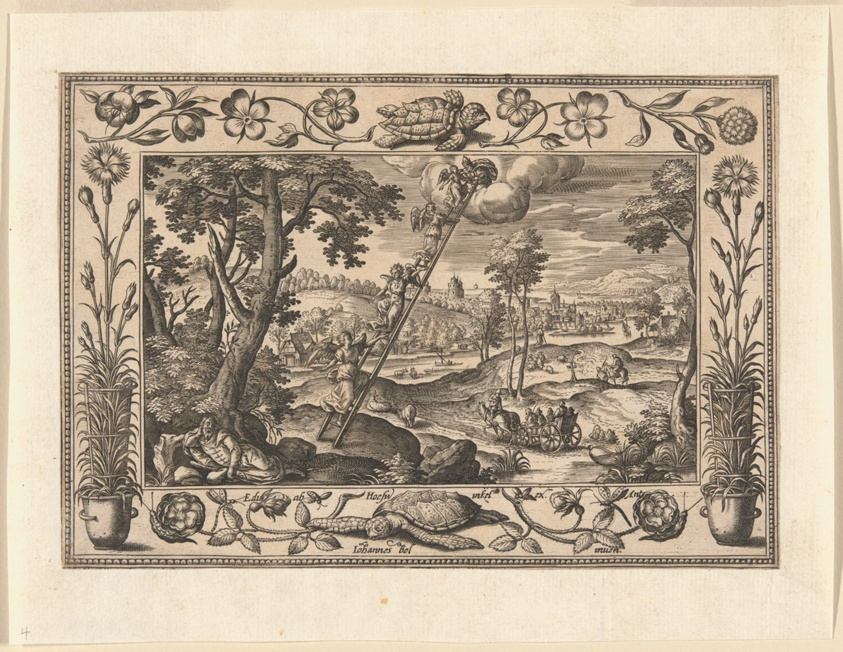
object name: Print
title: Jacob's Dream, from Landscapes with Old and New Testament Scenes and Hunting Scenes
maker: Adriaen Collaert (Flemish, c. 1560–1618); after Hans Bol (Flemish, 1535–1593); published by Anna van Hoeswinckel (Flemish)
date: 1584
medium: Engraving in black on cream laid paper, laid down on cream laid paper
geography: Flanders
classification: engraving; paper; print; prints and drawing